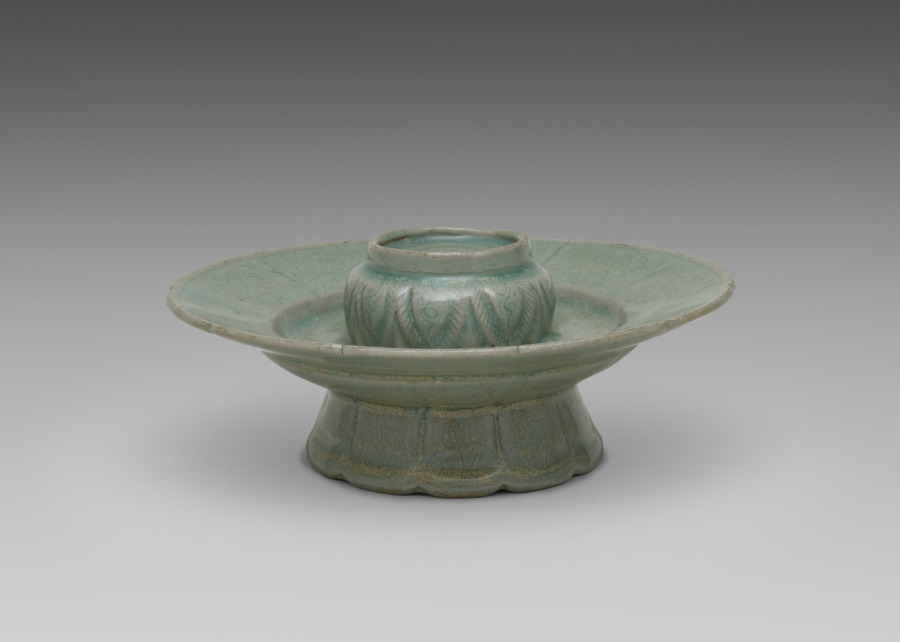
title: Floral-shaped Cup Stand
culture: Korea, Goryeo dynasty (918–1392)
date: 1200s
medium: pottery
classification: Ceramic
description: As early as the seventh century, the practice of drinking tea became an important part of elite culture in Korea. In enjoying teas, elites commissioned a variety of types of utensils and vessels including this delicate-looking cup stand, not only to make their tea-drinking experience more exciting, but also to show their refined taste.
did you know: Elites of the Goryeo period are known for their love of drinking tea and wine. This type of delicate-looking cup stands not only made their drinking experience more enjoyable, but also showed their refined taste.